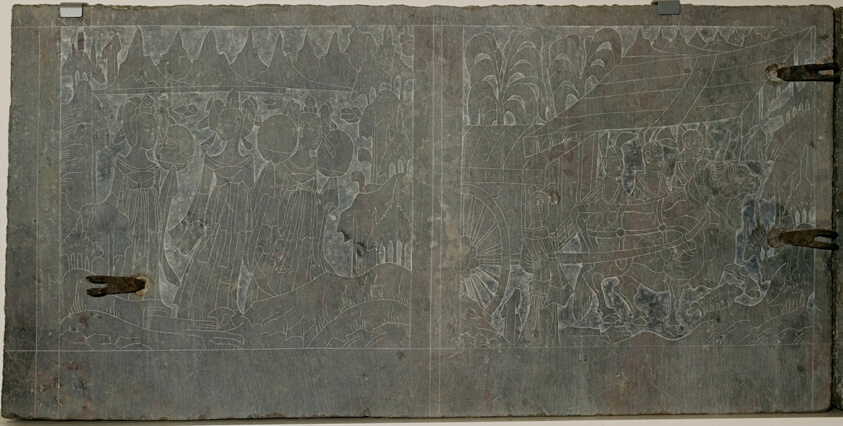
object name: Religious/Ritual Object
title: Panels from a Funerary Couch (Guanchuang)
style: Chinese (culture or style)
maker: China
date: Northern Wei dynasty (386–535); c. 525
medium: Limestone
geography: China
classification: stone; sculpture; asian art; ritual objects